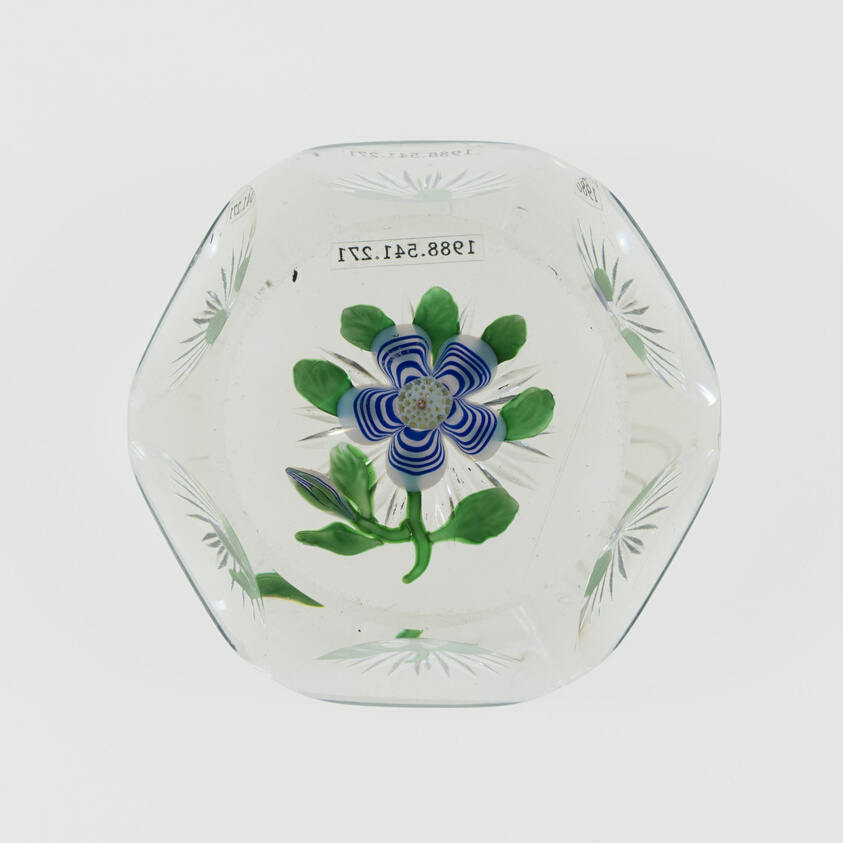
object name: Glass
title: Paperweight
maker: Baccarat Glassworks (Cristalleries de Baccarat); Lorraine, France, founded 1764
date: c. 1848–55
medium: Glass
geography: Baccarat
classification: paperweight; glass